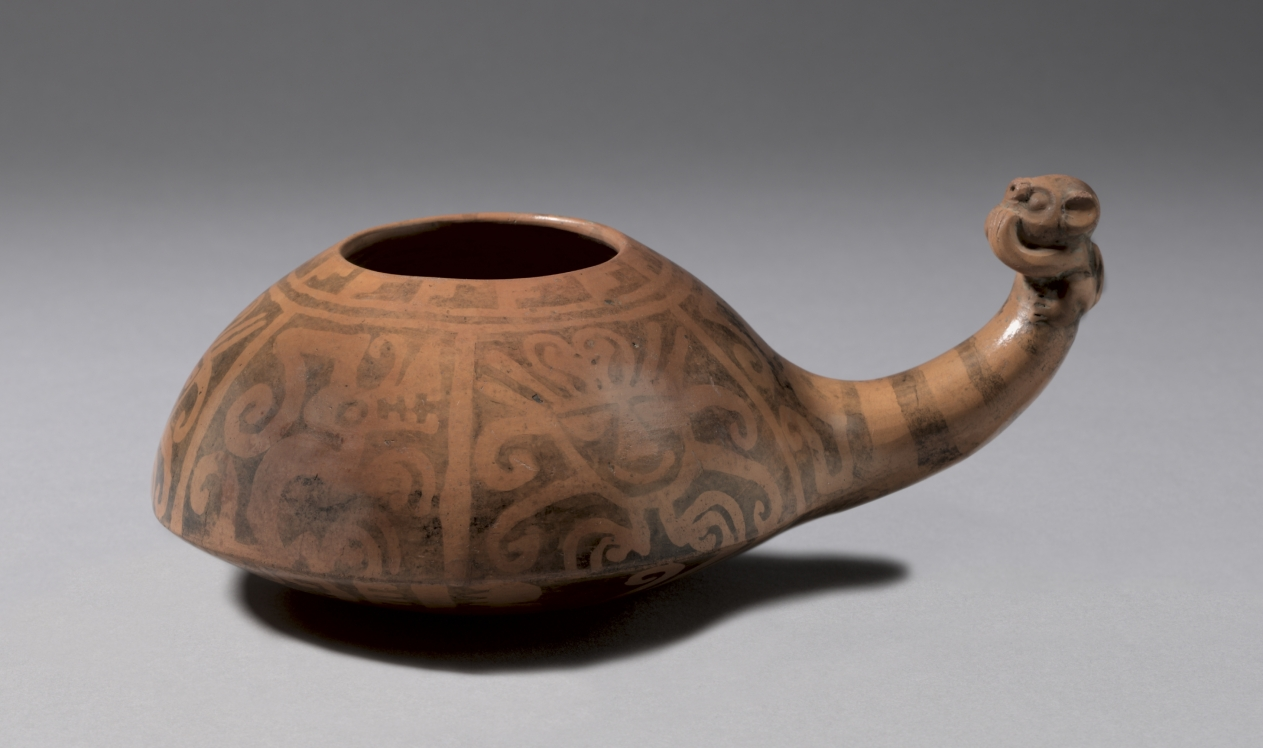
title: Dipper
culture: Peru, North Highlands, Recuay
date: 100 BCE–700 CE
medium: ceramic, slip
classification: Ceramic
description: Both of these objects feature a creature known as the "Recuay feline," although it could also refer to a fox, dog, or viscacha (a rodent). Whatever its identity, the prominent crest on its head ties it to the supernatural realm, a connection underlined by the deity head that also appears on the dipper and by the ritual function of snuff tablets, which were used to inhale hallucinogenic snuffs during religious ceremonies.